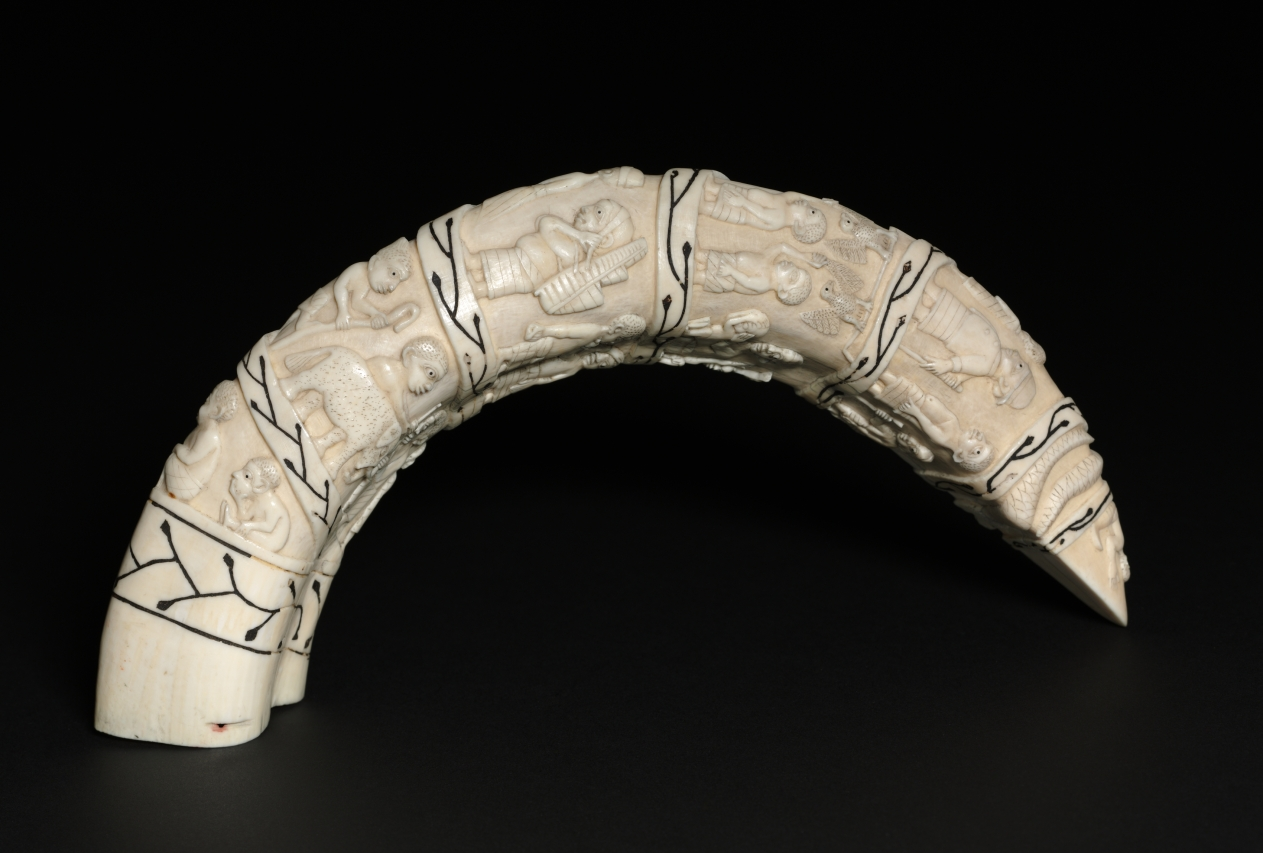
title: Carved Tooth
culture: Africa, Central Africa, Democratic Republic of Congo, Cabinda, or Republic of the Congo, probably Vili-style maker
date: late 1800s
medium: Hippopotamus ivory and organic material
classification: Sculpture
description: This is a fine example of art produced for sale to European visitors in the Lower Congo River area. A long history of cultural and artistic interactions between Africans and Europeans began in 1482, when the Portuguese first established diplomatic ties with the rulers of the Kongo kingdoms. Note the image of a foreign merchant pouring whiskey from a keg.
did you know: Spiral motifs have been found on Kongo Kingdom ivory carvings since at least the 1500s.